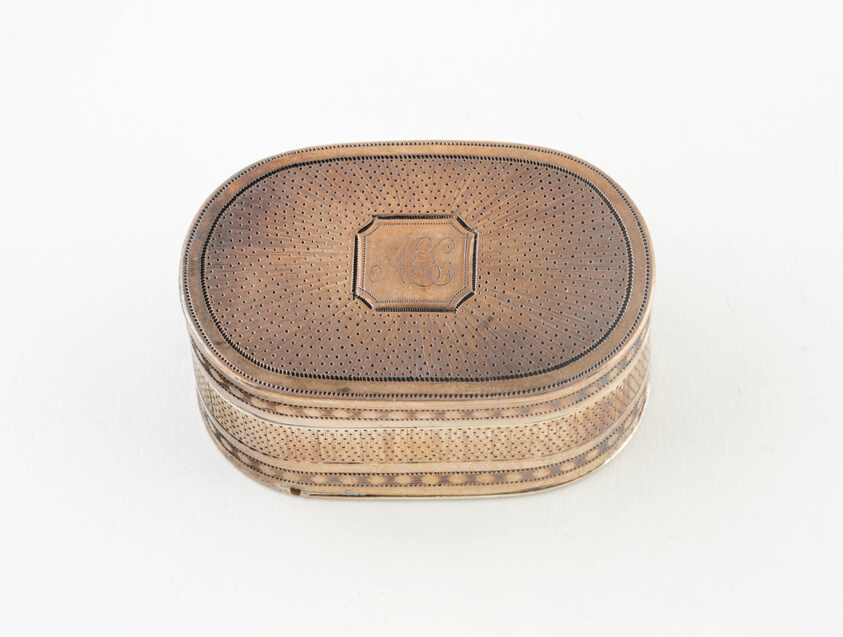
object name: Metalwork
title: Nutmeg Grater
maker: T. Phipps and E. Robinson (London, England)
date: c. 1798/99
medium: Silver and iron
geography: London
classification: container for personal use; box; european decorative arts; metalwork; silver; decorative object/ornament